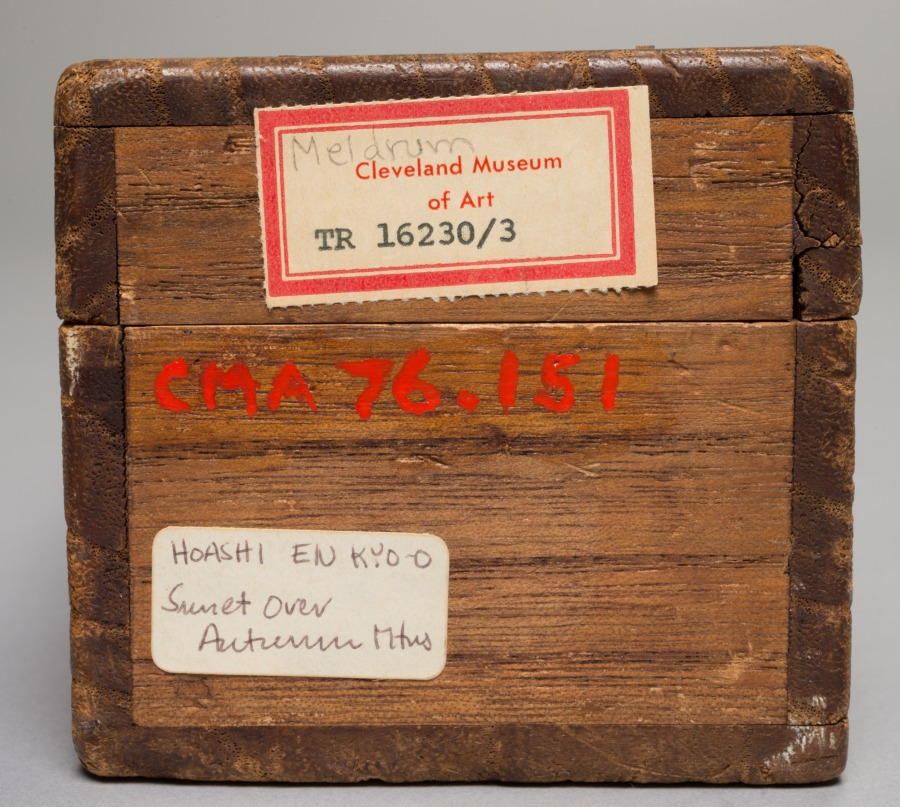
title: Sunset over Autumn Mountains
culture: Japan, Edo period (1615–1868)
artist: Hoashi Kyōu (Japanese, 1810–1884)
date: 1869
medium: hanging scroll; ink and light color on silk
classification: Painting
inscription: translation of poem [by Nora Liu]: The way was forgotten while enjoying the conversation and colors of Autumn, The road entered among the red trees and the white clouds, The trace of a path led to the lonely temple where the monks received enlightenment, The sound of chimes echo remotely in the mountains where the sunset falls. In the year 1869, Kyou